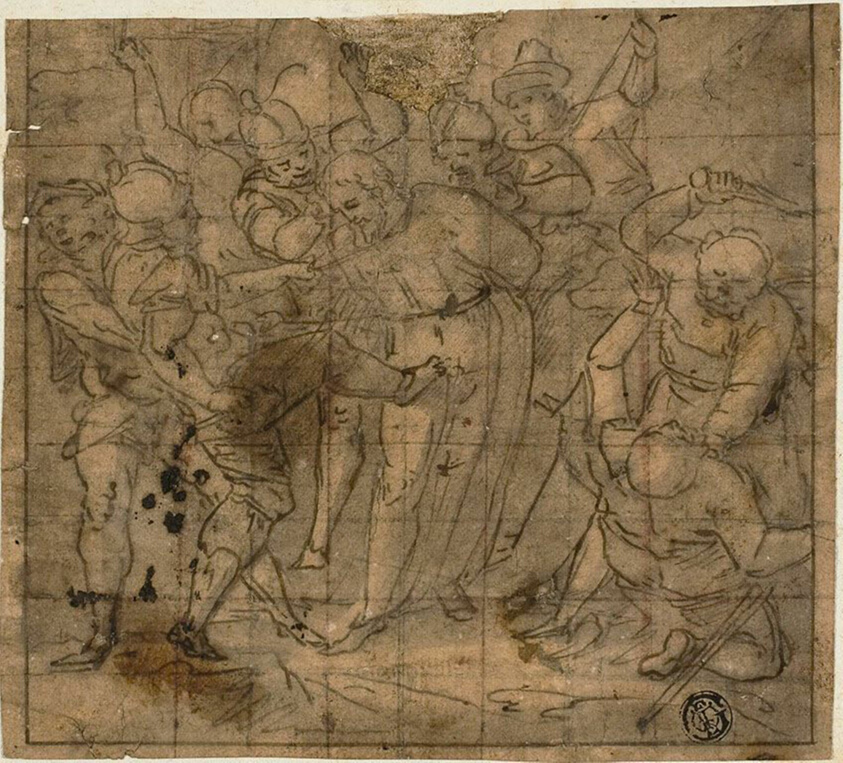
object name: Drawing and Watercolor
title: Mocking of Christ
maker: Follower of or after Luca Cambiaso; Italian, 1527-1585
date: 1562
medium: Pen and brown ink with brush and brown wash, on tan laid paper, squared in red and black chalk, laid down on ivory laid paper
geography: Italy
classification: ink with wash; drawings (visual works); prints and drawing